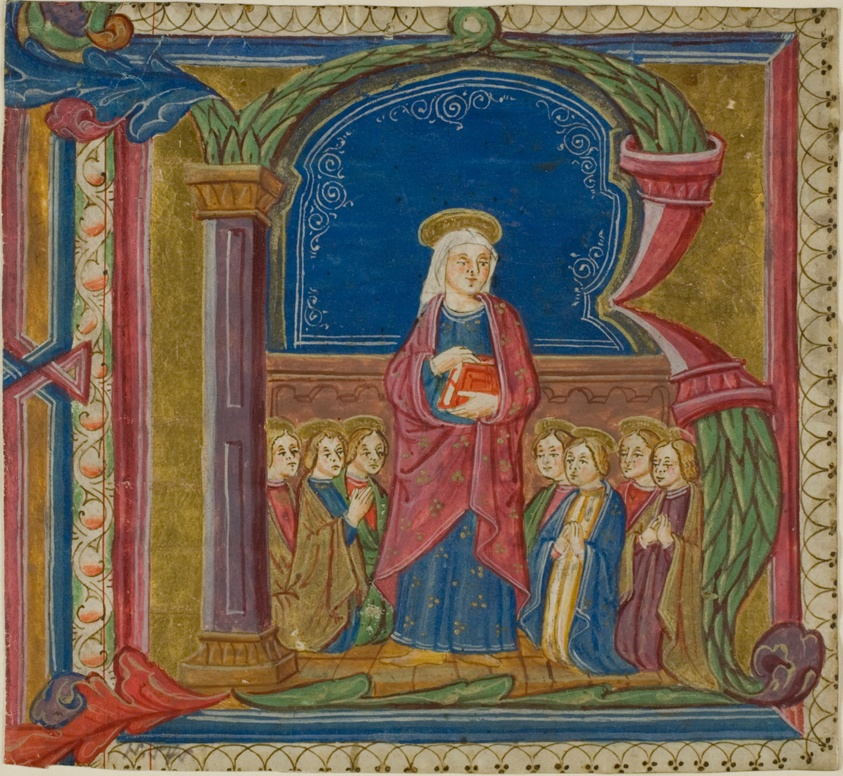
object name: Drawing and Watercolor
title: The Virgin Adored by Saints in a Historiated Initial "R" from an Antiphonary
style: medieval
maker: Italian (Lombardy)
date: 15th century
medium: Manuscript cutting in tempera and gold leaf on parchment, with gothica textura inscriptions in brownish-black, verso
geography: Italy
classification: tempera; manuscript; drawings (visual works); prints and drawing